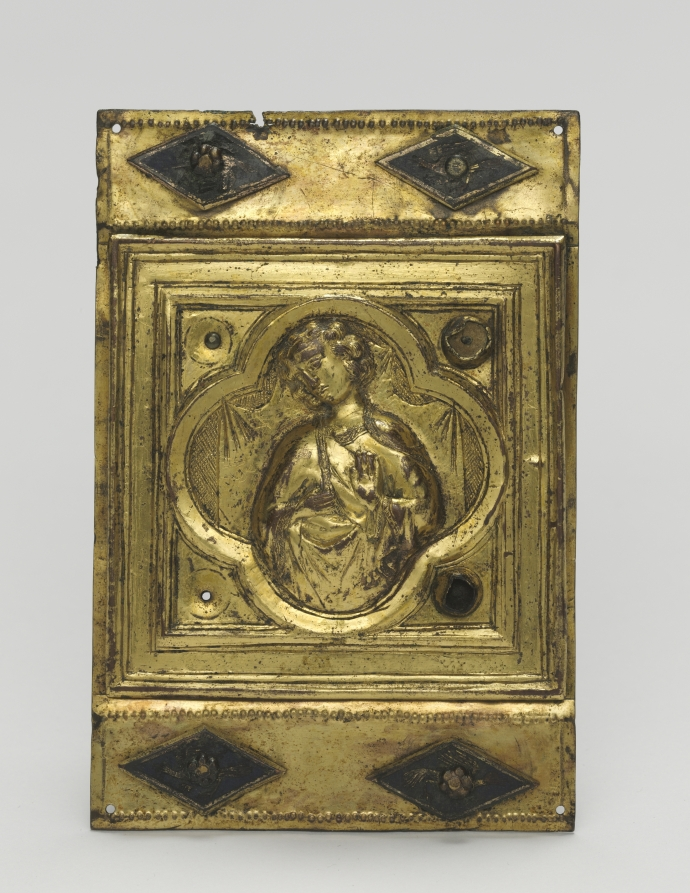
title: Ornamental Plaque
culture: Italy, Tuscany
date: c. 1380–1400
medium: champlevé enamel, glass paste stones, and gilding on copper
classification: Enamel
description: These plaques appear to have been part of a larger ensemble forming a band of decoration affixed to a church altar. Each plaque is decorated in multiple techniques-embossing, engraving, enameling, and gilding-to create a sumptuous visual effect.